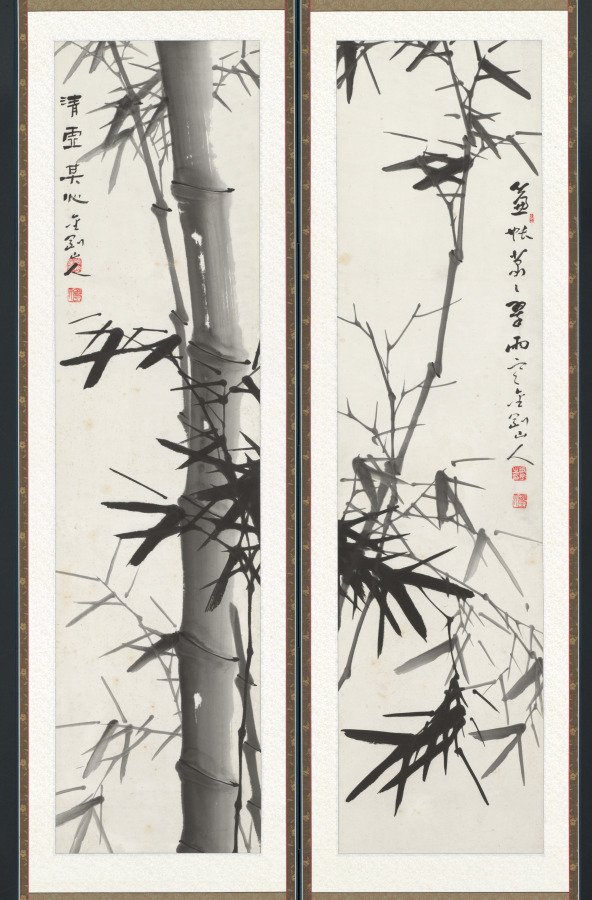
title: Bamboos in Wind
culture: Korea, Japanese colonial period (1910−1945)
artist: Kim Jin-woo (Korean, 1883–1950)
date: 1934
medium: Ten-panel folding screen; ink on paper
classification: Painting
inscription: Two chops stamped on each panel: 振宇之印 (Jinwoo’s Seal); 金剛山人 (Diamond Mountain Man)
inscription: Inscription written on the far-left panel: 甲戌流??寫於竹林堂金剛山人振宇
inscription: Inscription written on the 8th panel: 五百間淸風金剛山人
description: Active during the Japanese colonial period in Korea (1910–45), the artist Jin-woo Kim earned his artistic reputation for his expressive renditions of bamboo swaying in a strong wind. His piercing bamboo shoots are often compared to an iron spear, and their sharp leaves to a knife. It is believed that he deliberately emphasized sharpness in his brushstrokes to express his strong resistance against Japanese colonial oppression.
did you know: The artist’s prolific artistic production were a major part of fundraising efforts to support resistance activities for Korea’s independence.